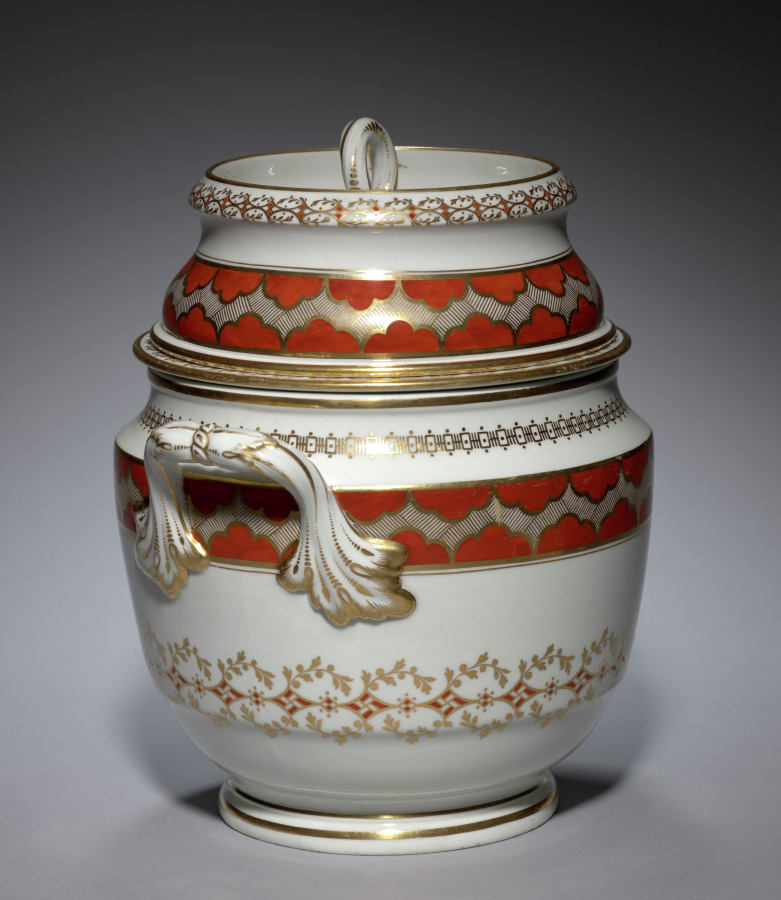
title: Ice Pail (1 of 2)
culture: England, late 18th-early 19th Century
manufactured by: Flight & Barr (British)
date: 1793–1807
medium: porcelain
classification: Ceramic